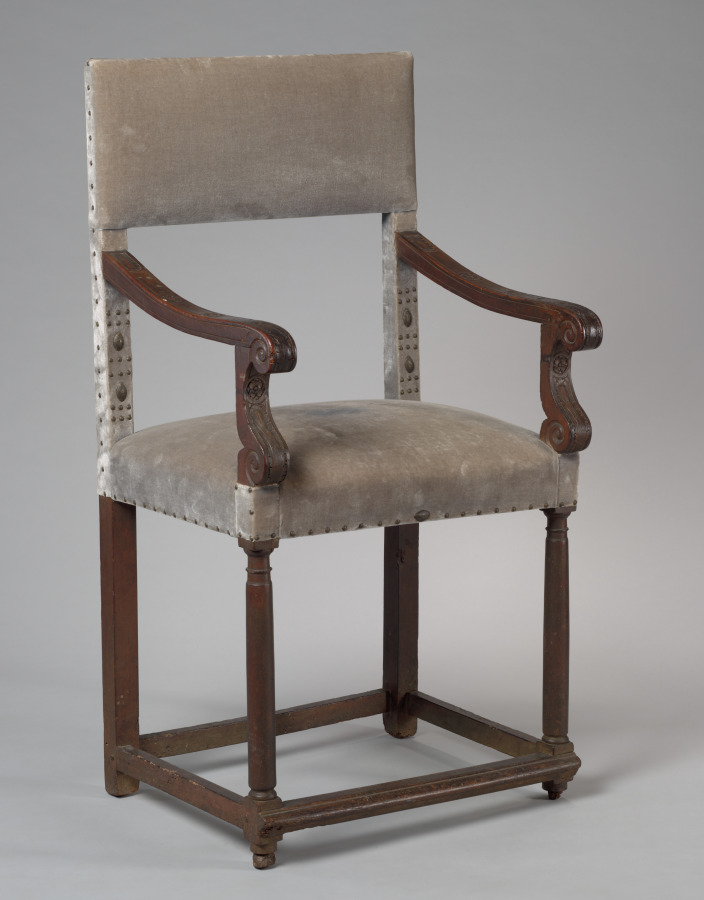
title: Armchair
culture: France, Henri II style, 16th century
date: 1500s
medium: walnut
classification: Furniture and woodwork